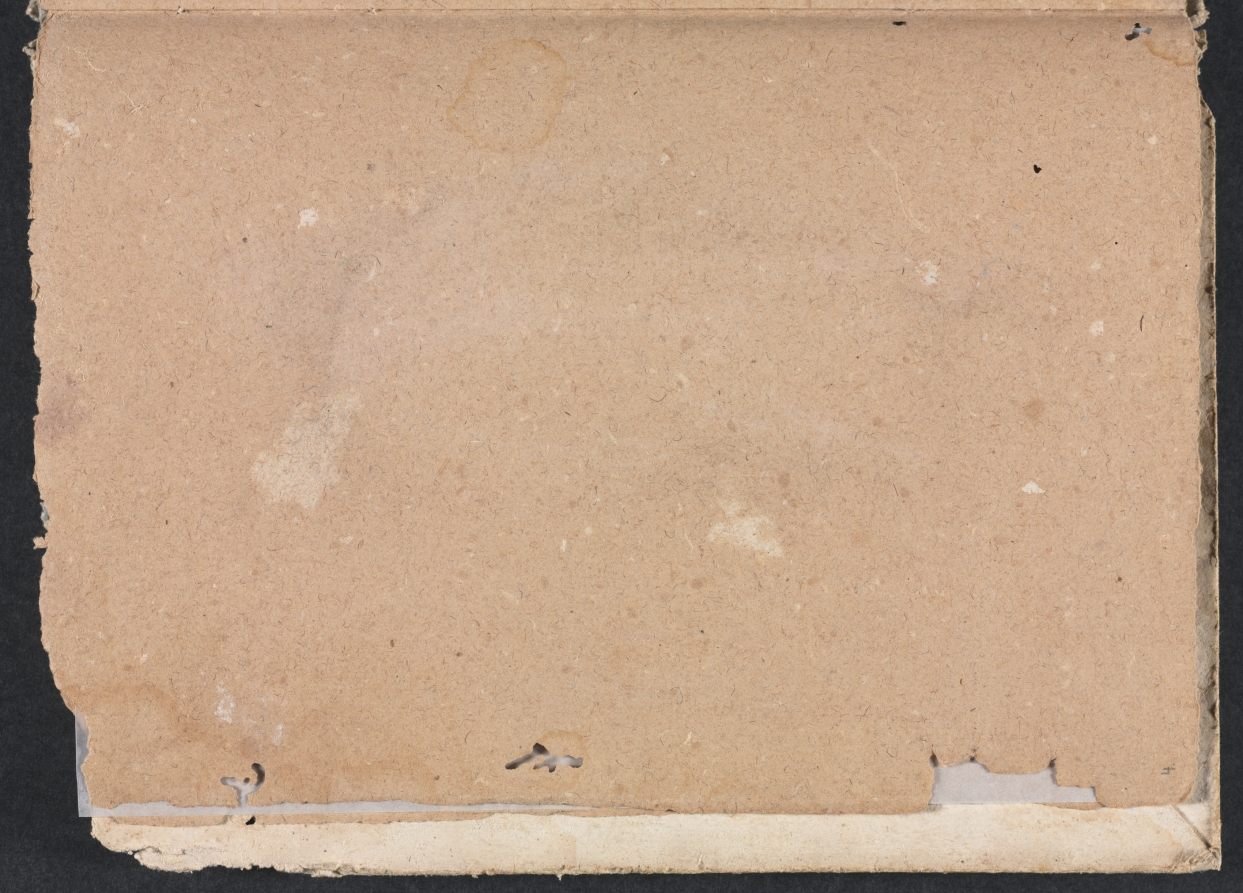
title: Verona Sketchbook: (page 4)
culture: Italy, 18th century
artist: Francesco Lorenzi (Italian, 1723–1787)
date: 1760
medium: paper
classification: Bound Volume